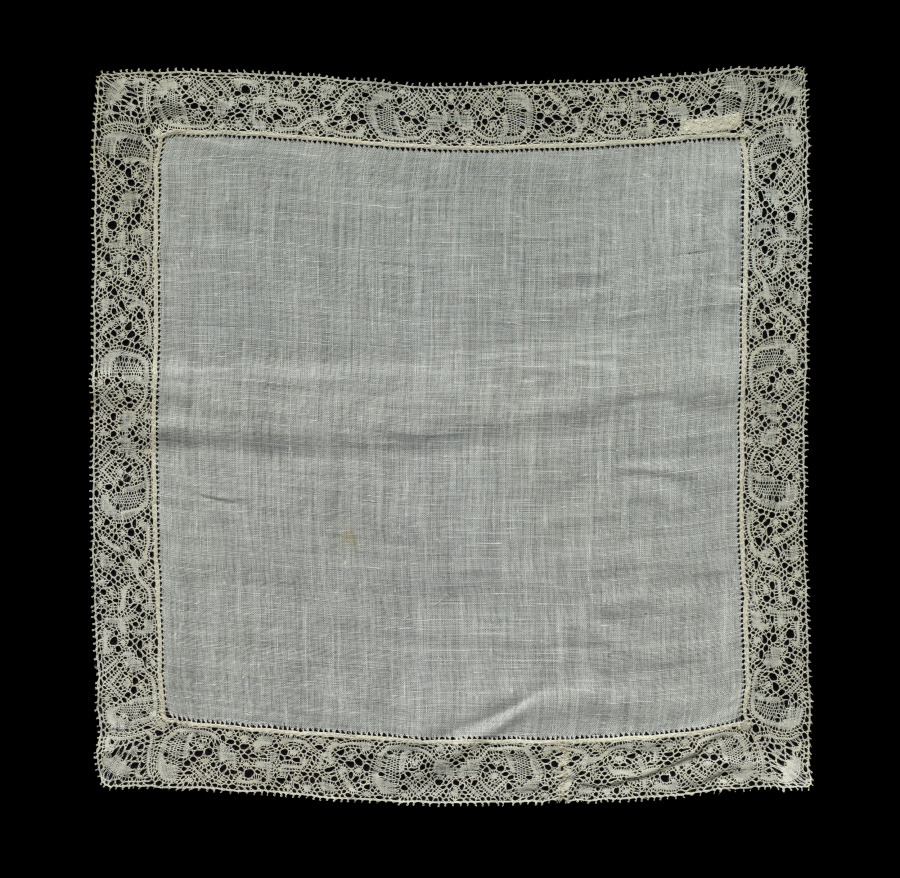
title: Lace Handkerchief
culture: Belgium, Binche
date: 1900–1935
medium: Plain weave linen center with bobbin lace (Binche) edging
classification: Lace